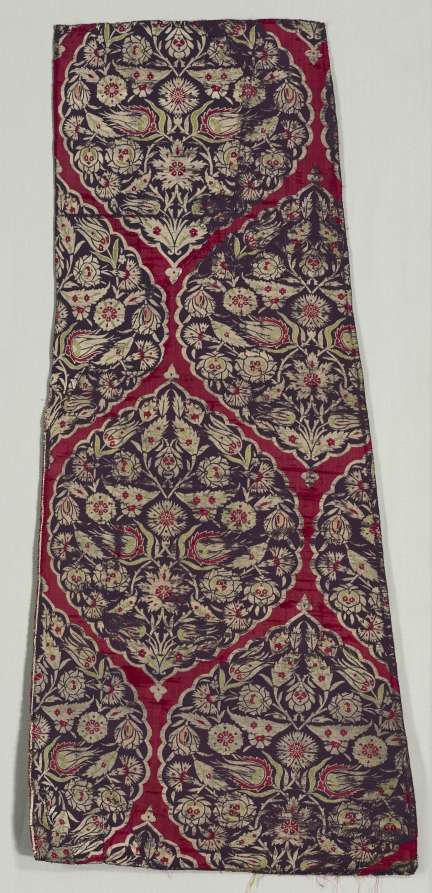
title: Brocaded silk with foliate medallions from a kaftan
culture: Turkey, Istanbul, Ottoman period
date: 1525–75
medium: Silk: lampas weave, silver-metal thread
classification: Textile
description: Medallions enriched with floral and foliate decoration were signature Ottoman patterns during the height of silk textile production in the second half of the 1500s. Imperial kaftans with related patterns are preserved in the Topkapi Palace Museum in Istanbul along with those worn by young princes. In this splendid length from a kaftan, abundant silver-thread flora and overlapping leaves on vines enliven medallions in the densely woven fabric. It is a combination of two weaves, called lampas, which creates two contrasting surfaces composed of vertical warps and horizontal wefts.